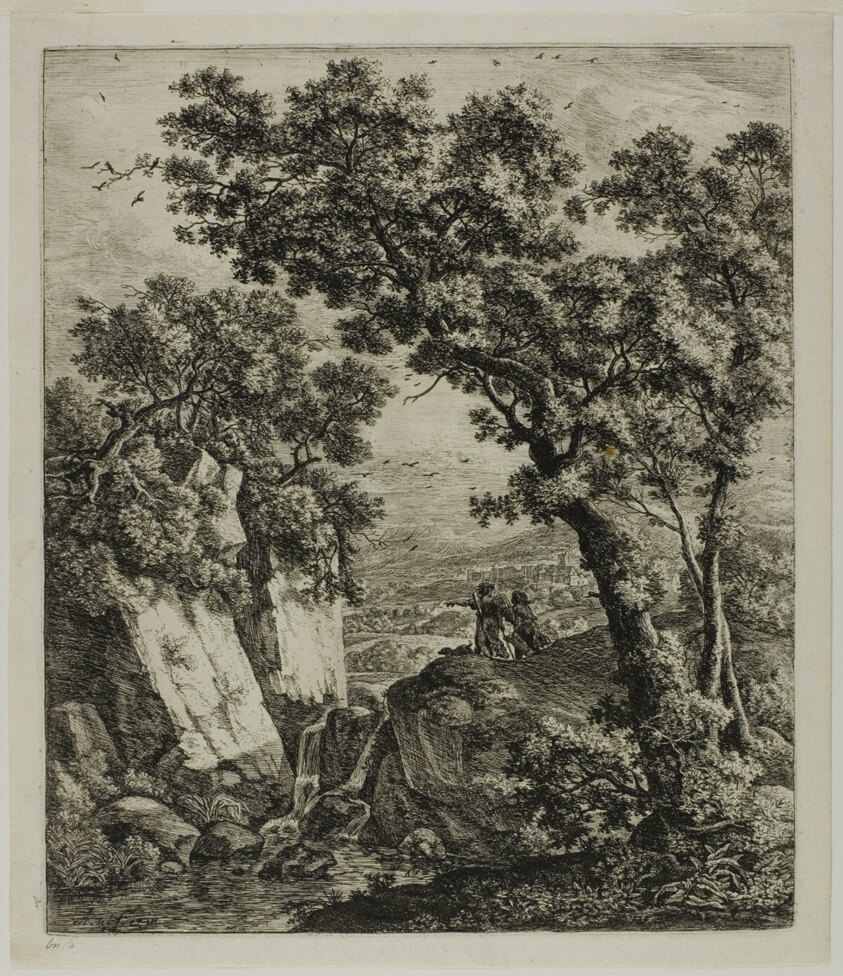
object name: Print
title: Tobias and the Angel, from Six Landscape Subjects from the Old Testament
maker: Anthonie Waterloo (Dutch, c. 1610-1690)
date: 1650/60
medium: Etching on paper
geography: Holland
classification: etching; print; prints and drawing